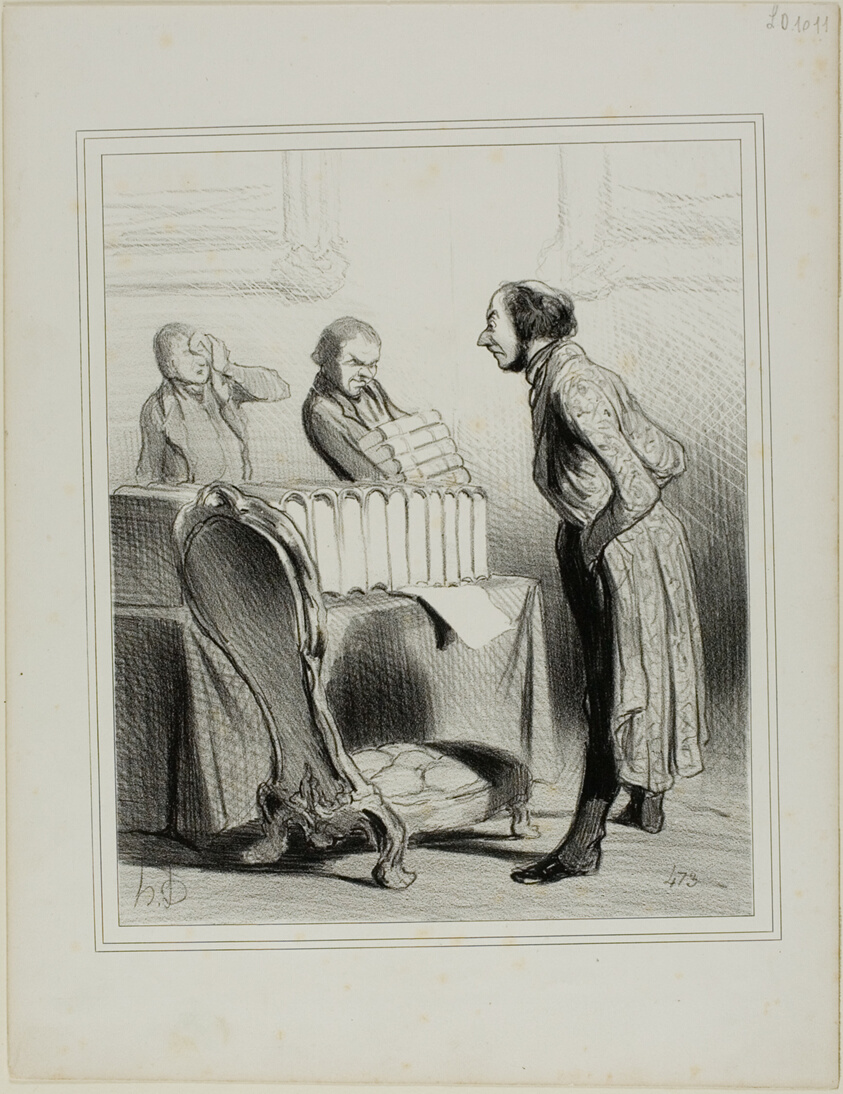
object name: Print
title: This is What Nowadays is Called a Light Work. “- My God, what's this!.... an encyclopaedia? “- No sir.... it is the novel 'the mysteries of Paris' that Madame bought at the bookshop of our Master. We will bring you the rest of the oeuvre as soon as it appears.,” plate 13 from Revue Caricaturale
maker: Honoré Victorin Daumier; French, 1808-1879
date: 1843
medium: Lithograph in black on white wove paper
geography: France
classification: lithograph; print; prints and drawing